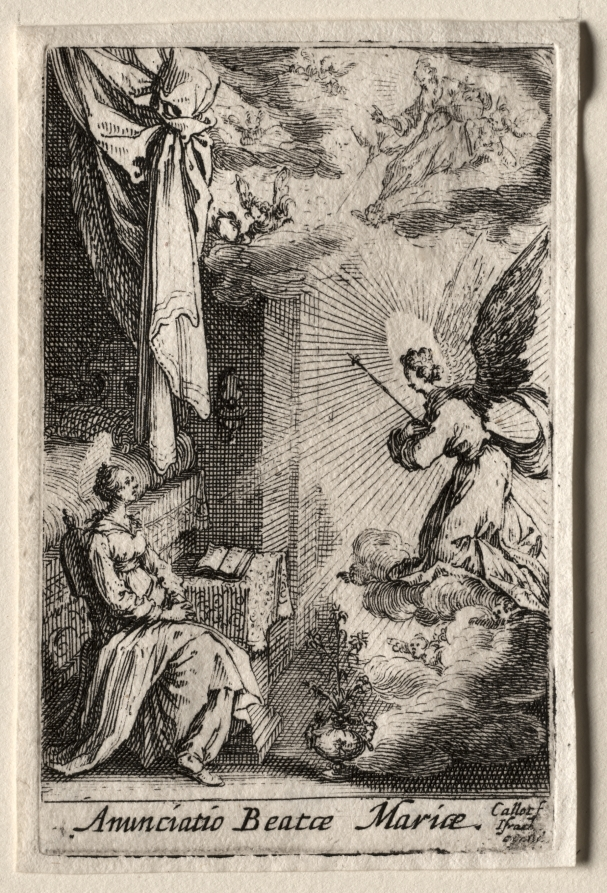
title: The Annunciation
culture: France, 17th century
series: The Life of the Virgin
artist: Jacques Callot (French, 1592–1635)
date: c. 1633–34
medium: etching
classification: Print